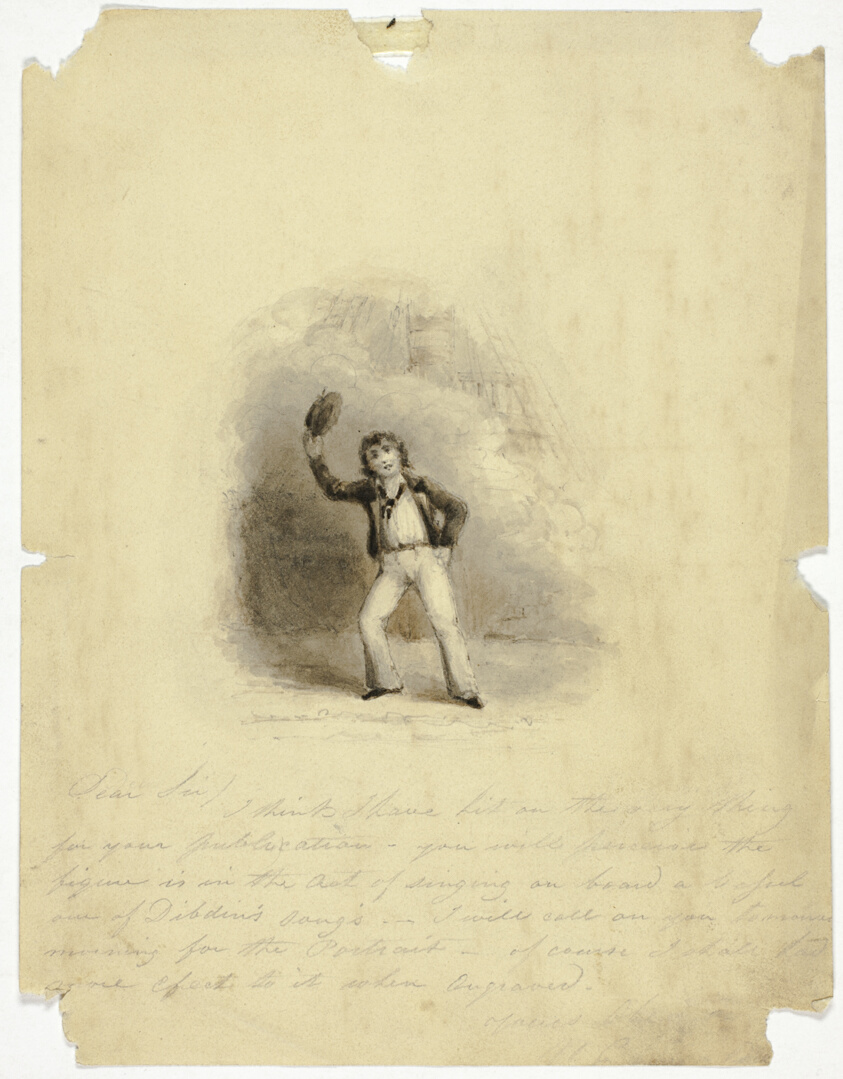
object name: Drawing and Watercolor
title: Sailor Boy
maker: Unknown Artist; British, 19th century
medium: Brush and brown and gray wash, over graphite, on tan wove paper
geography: United Kingdom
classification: ink or chalk wash; drawings (visual works); prints and drawing